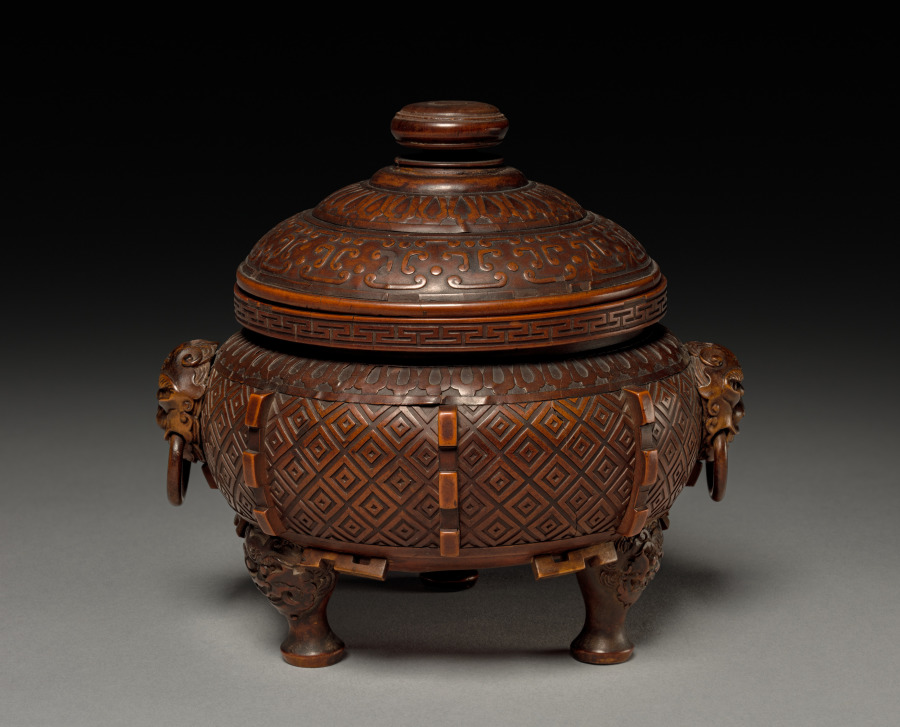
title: Tripod with Cover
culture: China, Qing dynasty (1644-1911)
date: late 1700s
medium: carved wood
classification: Wood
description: In the Qing (1644–1911) dynasty, luxury items became more affordable to larger parts of the society, including women, merchants, and literati in non-official positions. Imperial patronage and a growing urban population encouraged consumption of luxury goods and local craftmanship. This wooden tripod illustrates superb carving skills and the creative mind of the skilled artisan who sought clients on a competitive market.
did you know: Each leg of the tripod is decorated with a lion head.